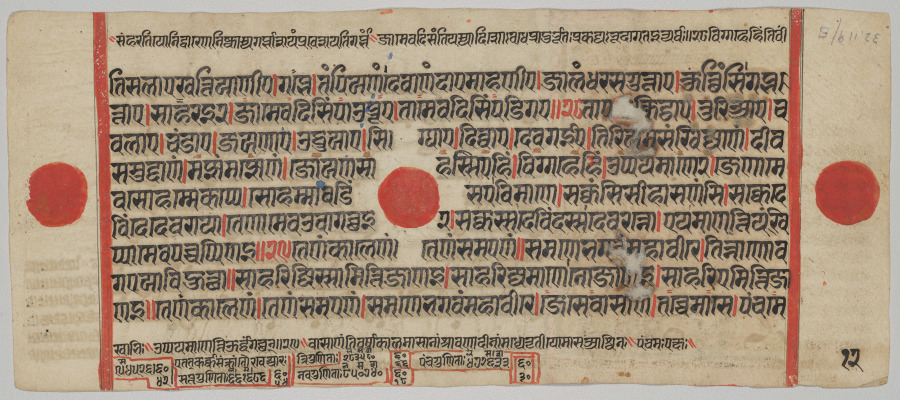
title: Text, folio 12 (verso), from a Kalpa-sutra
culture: Western India, Gujarat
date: c. 1475–1500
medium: Gum tempera, ink, and gold on paper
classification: Painting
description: The tiny captions written in Sanskrit to the right of the painting identify the subject of this scene: “abduction of the embryo” and “transfer of the embryo.” The embryo is the unborn founder of the Jain religion. In this miraculous episode, a goat-headed divinity who presides over miscarriage and childbirth gently takes the embryo in his cupped hands away from the reclining Brahmin lady in the scene above. Below, he carries it to a queen, who will be his birth mother.